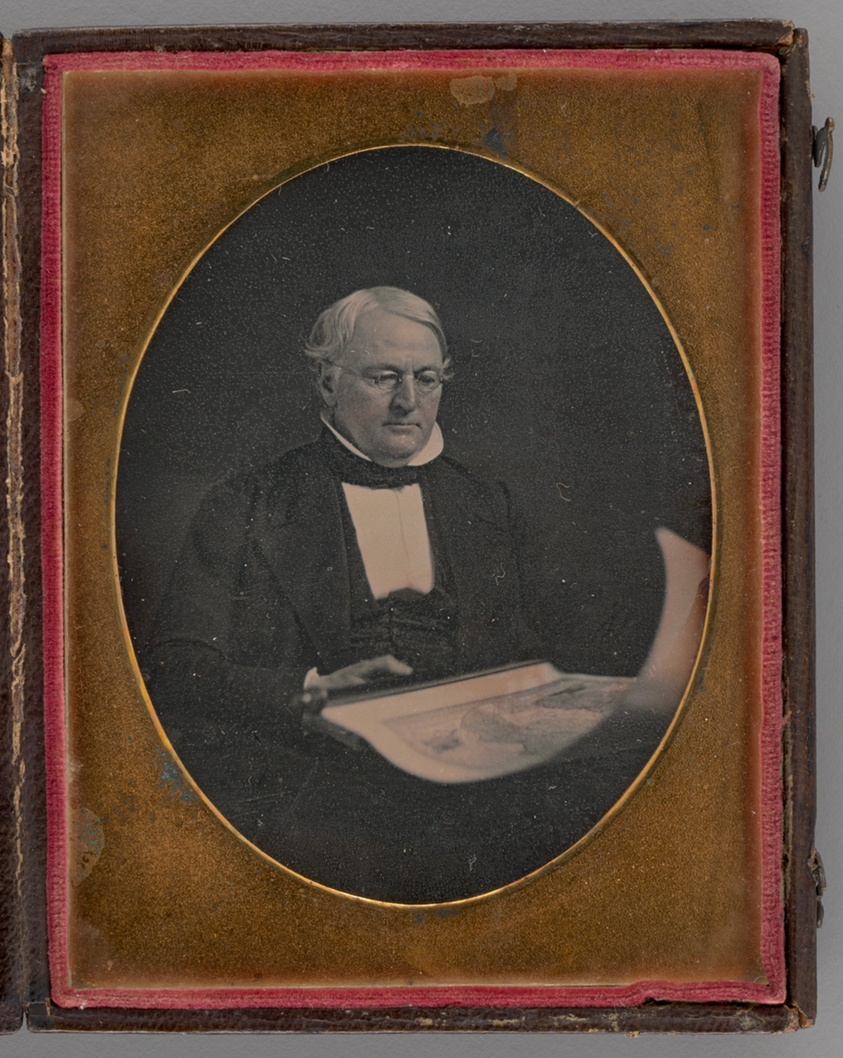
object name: Photograph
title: Untitled (Portrait of a Seated Man Holding a Map)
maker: Marcus Aurelius Root (American, 1808-1888)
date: 1847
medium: Daguerreotype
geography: United States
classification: portrait; photography; photographic process; photograph; daguerreotype; portrait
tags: lundberg collection